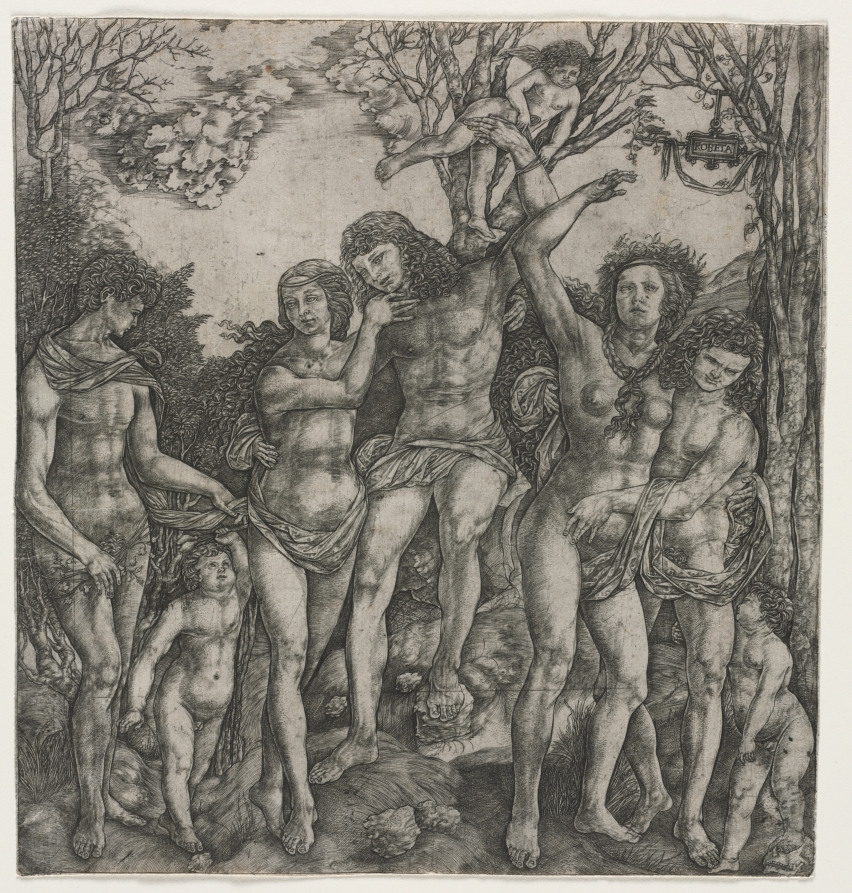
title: Allegory of Carnal Love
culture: Italy, 20th century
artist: Cristofano Robetta (Italian, 1462–1534)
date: c. 1530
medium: engraving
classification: Print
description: This enigmatic group of figures is most likely an allegory (a representation of an abstract idea) centered on human love. The winged Cupid lashes a man’s arm to a tree, while a long sash binds together two couples who hungrily touch one another. A figure of ambiguous sex at left holds the end of the sash. The print may be related to Neoplatonic love treatises in Florence. One such treatise argued that the sense of touch operates between sensual and spiritual realms, an idea embodied by Hermaphroditus, an intersex figure described in Greek myth. A direct connection remains elusive.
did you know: Robetta worked in a manner of engraving known as the fine manner, characterized by its extremely fine lines combined with crosshatching and dots.